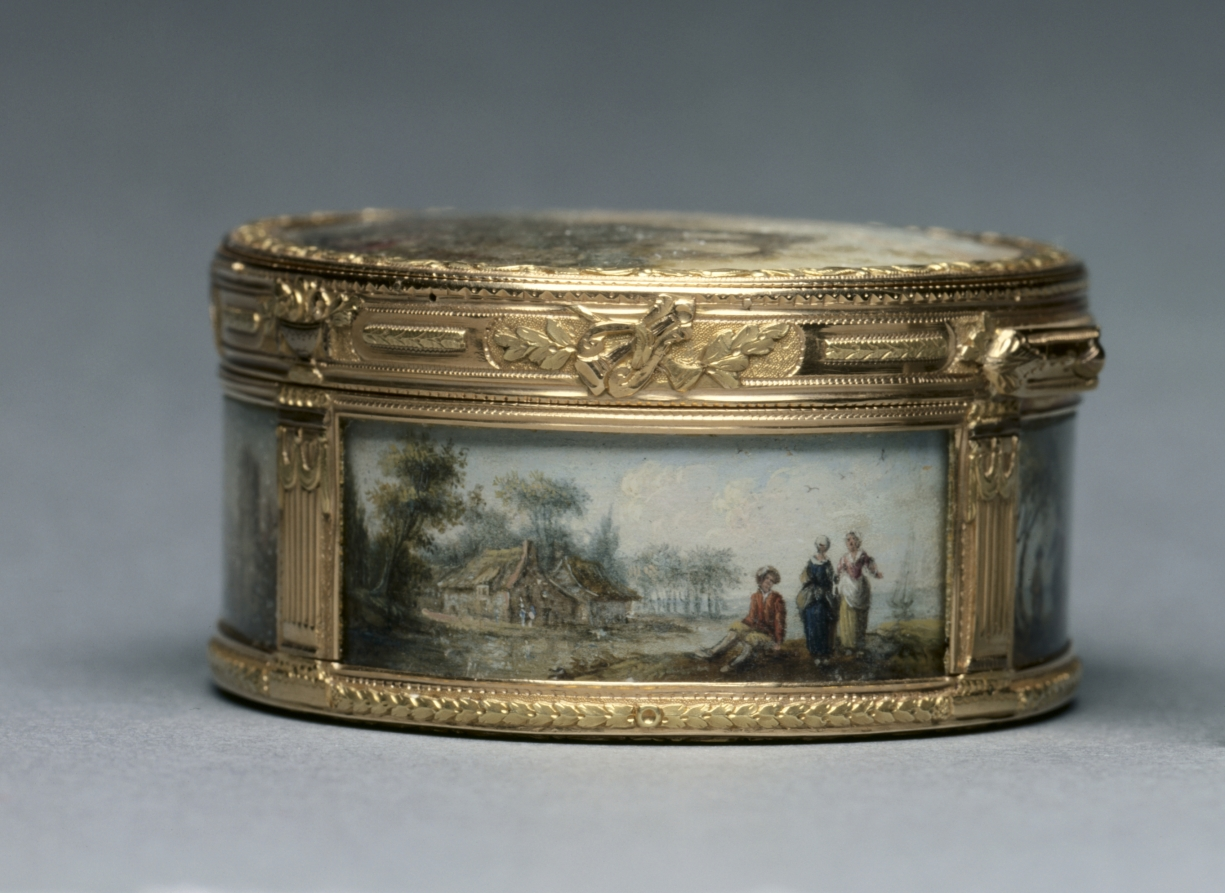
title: Snuff Box (Tabatière)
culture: France, 18th century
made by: Pierre-Nicholas Pleyard (French)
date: 1768–69; 1776–78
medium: gouache miniatures mounted on gold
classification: Metalwork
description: Snuff boxes were highly ornamented functional objects popular among French social elites. They were simultaneously containers for powdered tobacco and a means to communicate social and political status. Often decorated with miniature paintings inspired by popular paintings of the time, the works reproduced on this box are modeled after those of Claude-Joseph Vernet (cover and front panel) and David Teniers the Younger (base, side, and back panels).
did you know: These miniature paintings are mounted à cage, a practice popular in the mid-1700s that involved setting decorated panels into gold frames to create a box’s walls.